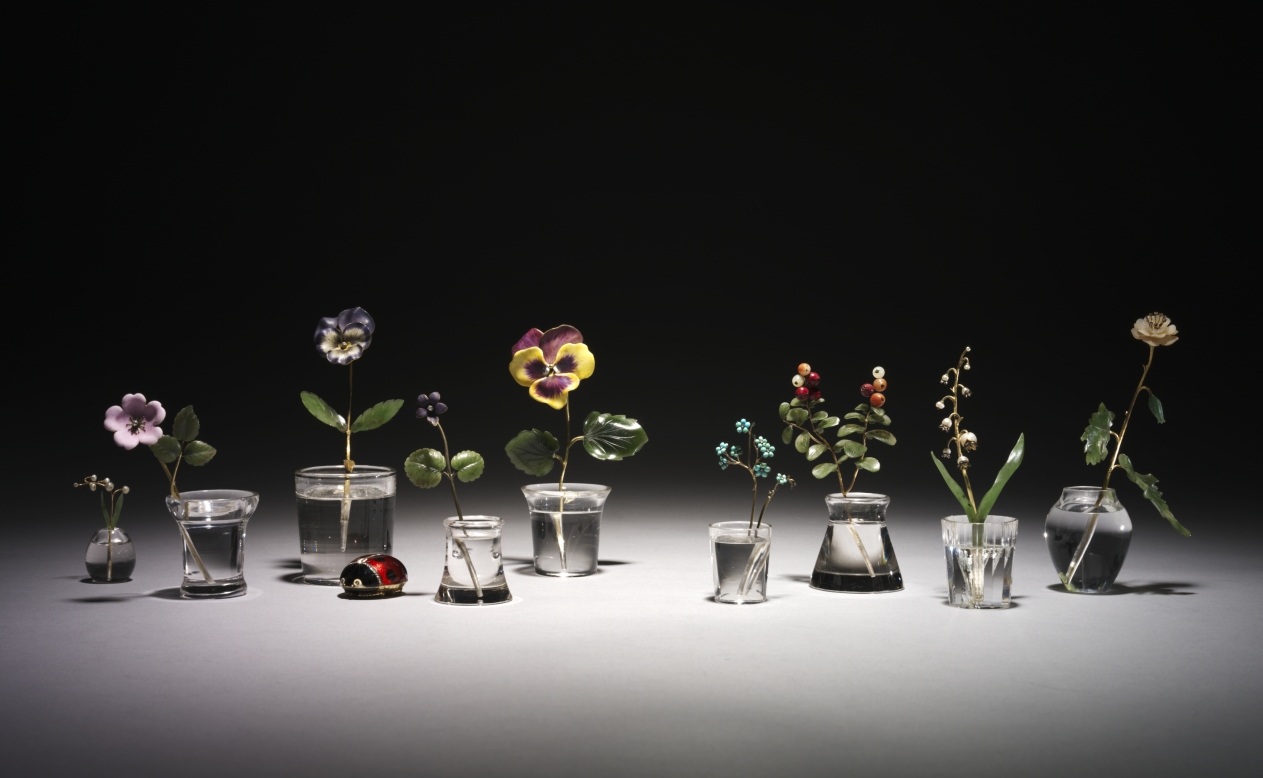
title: Ladybird Beetle Pillbox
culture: Russia, St. Petersburg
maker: House of Fabergé (Russian, 1842–1918)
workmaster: Mikhail Evlampievich Perkhin (Russian, 1860–1903)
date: 1896–1903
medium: gold, enamel, diamonds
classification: Miscellaneous